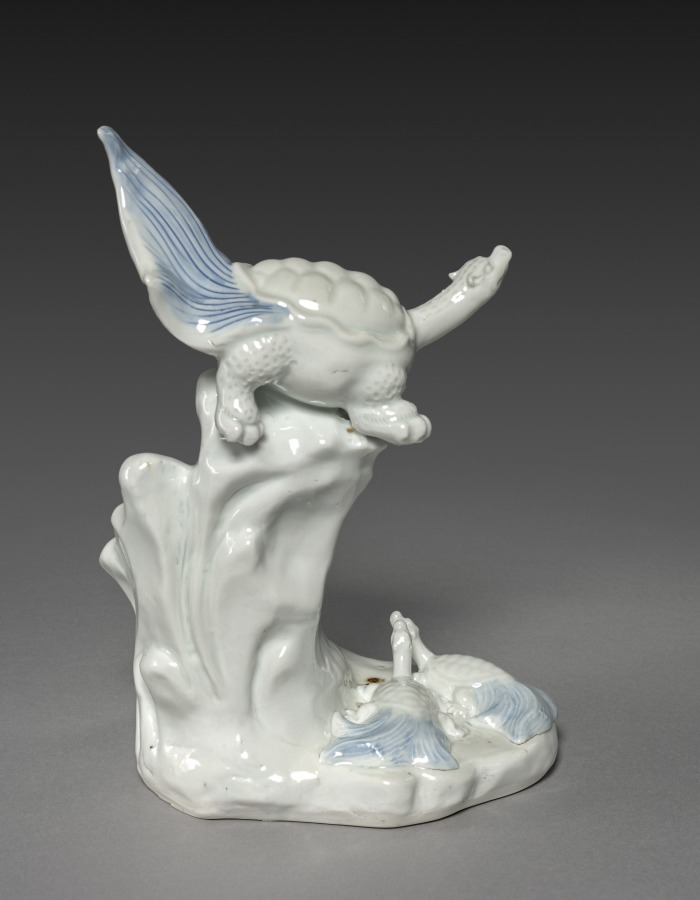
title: Tortoises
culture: Japan, Edo period (1615–1868)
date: early to mid-1800s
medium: porcelain, molded and carved, with underglaze blue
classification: Ceramic